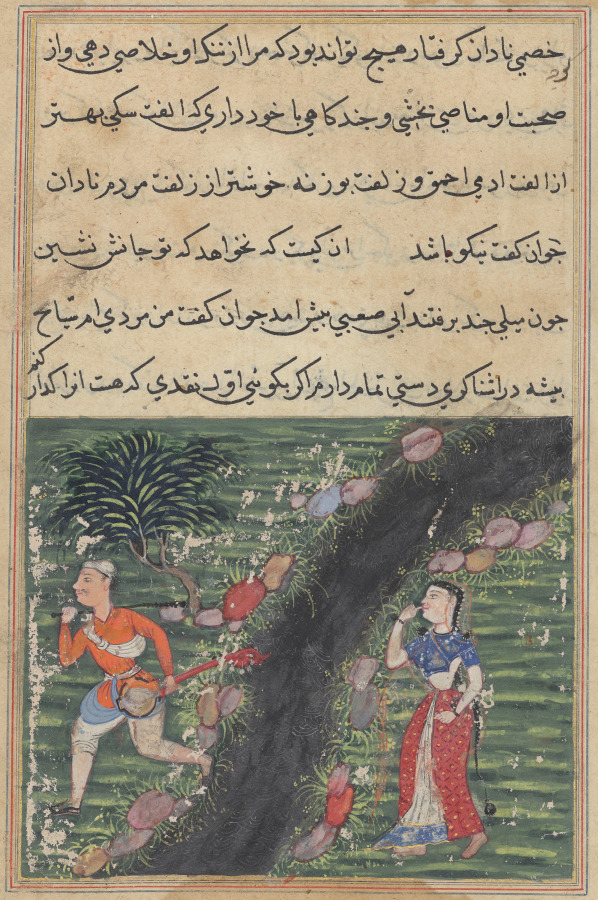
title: The vagabond crosses a stream with the possessions of the daughter-in-law of the king of Banaras and absconds, from a Tuti-nama (Tales of a Parrot): Sixteenth Night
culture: Mughal India, court of Akbar (reigned 1556–1605)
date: c. 1560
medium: gum tempera, ink, and gold on paper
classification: Painting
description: After agreeing to run away with the daughter-in-law of the king of Banaras, the destitute young man realizes that their relationship is unlikely to end happily. He leaves, taking her valuables with him. The woman, now alone on the other side of the stream, bereft of her jewelry, touches her index finger to her mouth in a gesture of shock.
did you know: The stream was painted in silver, which has tarnished.